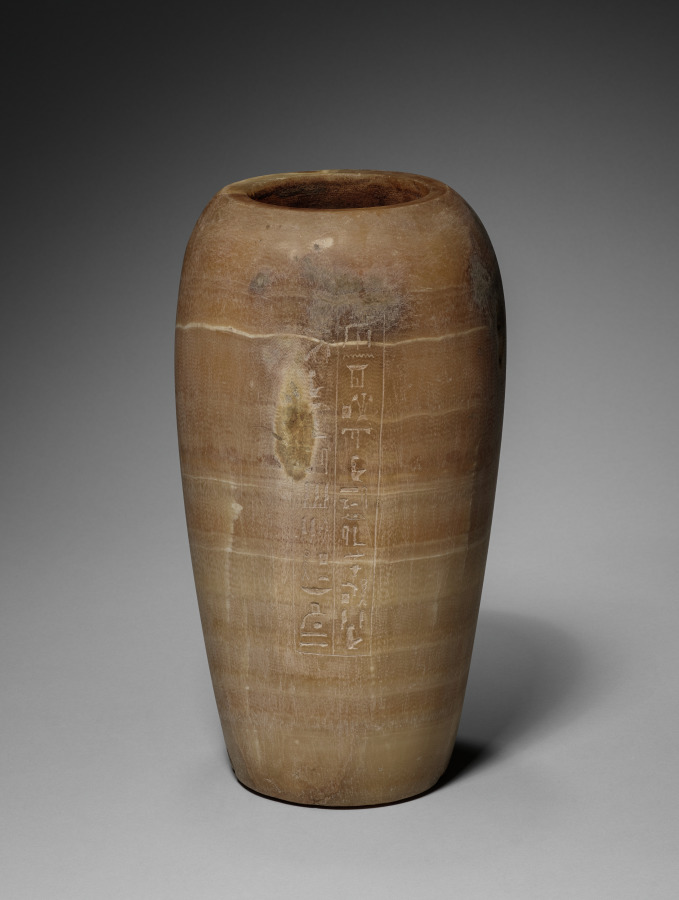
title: Canopic Jar with Baboon's Head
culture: Egypt, Late period (715–332 BCE), Dynasty 26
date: 664–525 BCE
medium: travertine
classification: Funerary Equipment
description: In the process of mummification, the liver, lungs, stomach, and intestines were removed, separately embalmed, and stored in specialized jars known as canopic jars (after a sailor in Greek mythology, who died at the town of Canopus in the Nile Delta and was worshipped there in the form of a human-headed jar). Each organ was identified with one of four funerary deities collectively known as the Sons of Horus: the liver with Imsety (man's head), the lungs with Hapy (baboon's head), the stomach with Duamutef (jackal's head), and the intestines with Qebehsenuef (falcon's head). It was their duty to protect the deceased and restore to him his body parts in the hereafter.